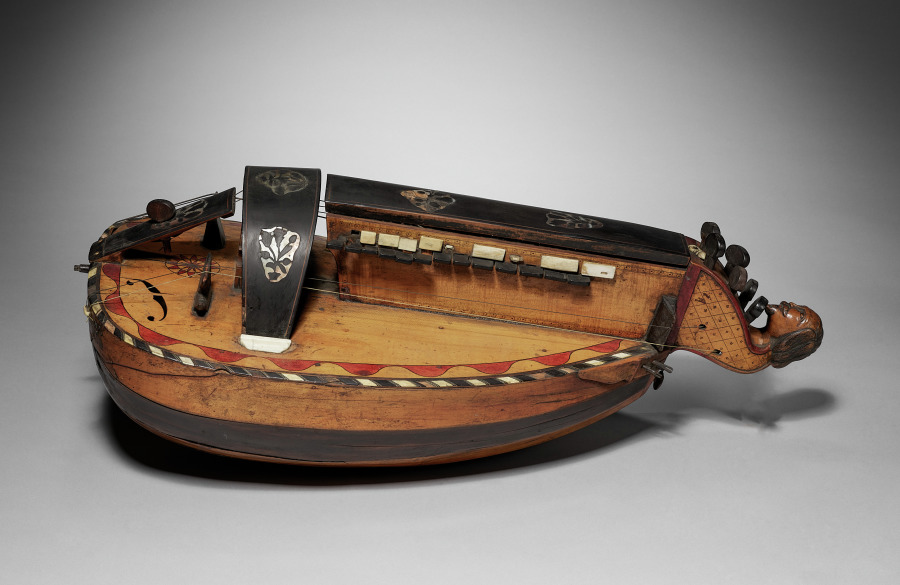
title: Vielle à roue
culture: France, 18th century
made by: Pajot of Jánzat (French)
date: 1700s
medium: wood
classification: Musical Instrument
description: The instrumentalist could play melodies on the keyboard that presses tangents against one or more strings. Often there are also multiple drone strings, which give a constant pitch accompaniment to the melody, resulting in a sound similar to that of bagpipes. This type of instrument is depicted in several artworks in the CMA collection: 1924.656, 2008.34.2, 1960.20. The vielle à roue is also related to the Swedish nyckelharpa, which was featured on the CMA performing arts series in 2017 played by Emilia Amper.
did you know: Also known as a “hurdy-gurdy” or “wheel fiddle,” this instrument produces sound by a hand crank-turned rosined wheel rubbing against the strings.